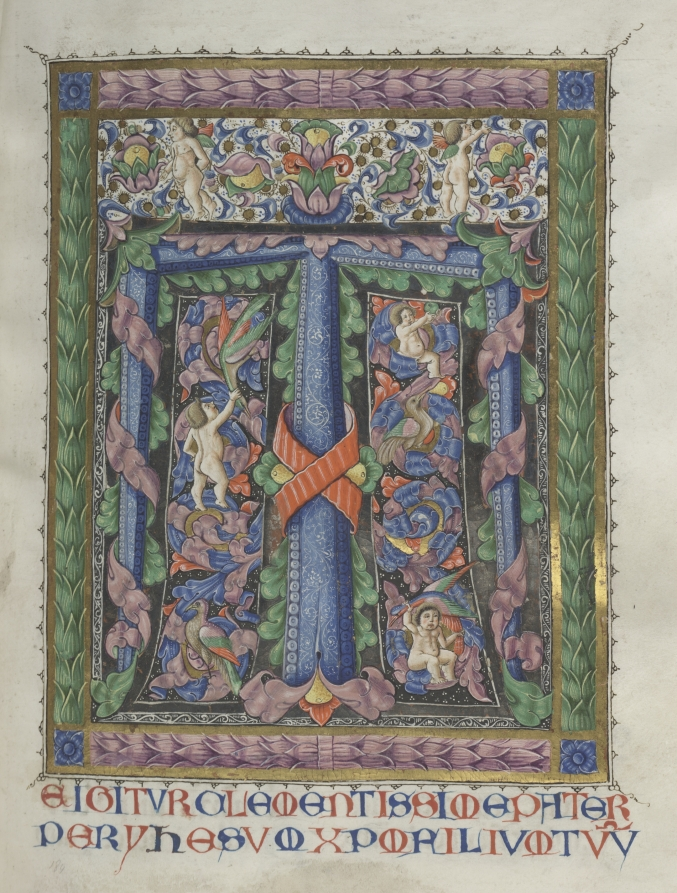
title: Missale: Fol. 186: Decorated Initial T[e igitur] (full page)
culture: Italy, Perugia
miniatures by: Bartolommeo Caporali (Italian, c. 1420–1503)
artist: assisted by Giapeco Caporali (Italian, d. 1478)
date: 1469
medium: ink, tempera and burnished gold on vellum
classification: Bound Volume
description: This illuminated manuscript once served as a liturgical service book used on the high altar by a priest for the Mass. The missal’s colophon (inscription) identifies the book as belonging to the church of San Francesco in Montone, a convent of Franciscan friars, and gives its date of completion as October 4, 1469. Here, the volume is opened to its masterpiece, two pages that introduce the canon of the Mass, the most solemn part of the celebration during which the priest consecrates the Eucharistic bread and wine. The missal receives its name from the two Perugian artists who collaborated to illuminate its pages. Here, the Calvary scene featuring the crucified Christ flanked by the Virgin and Saint John is the work of Bartolomeo Caporali, and the marginal decoration and the facing page are likely the work of his brother, Giapeco. Saint Francis’s appearance at the foot of the cross attests to the missal’s Franciscan use and affiliation.